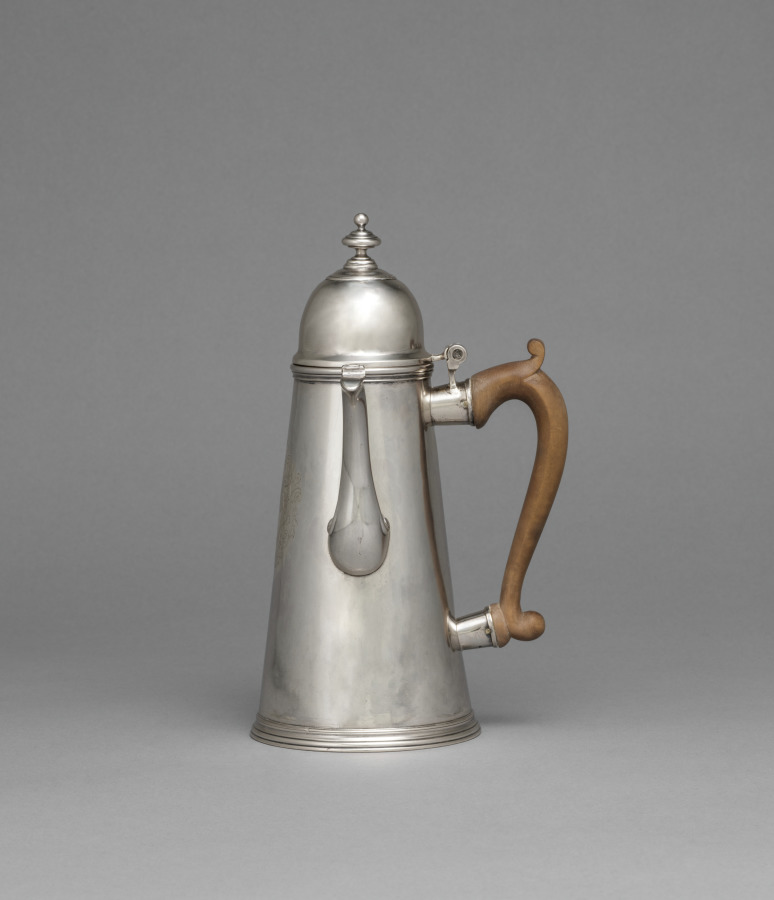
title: Coffee Pot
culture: England, London, 18th century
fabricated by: John Chartier (British)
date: 1702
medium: silver, wooden handle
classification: Silver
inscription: scratched on base: "21=16"; "21=12." Coat of arms engraved in contemporary mantling: oak tree with four lower branches beginning to sprout. (Arms of "Here" family.)